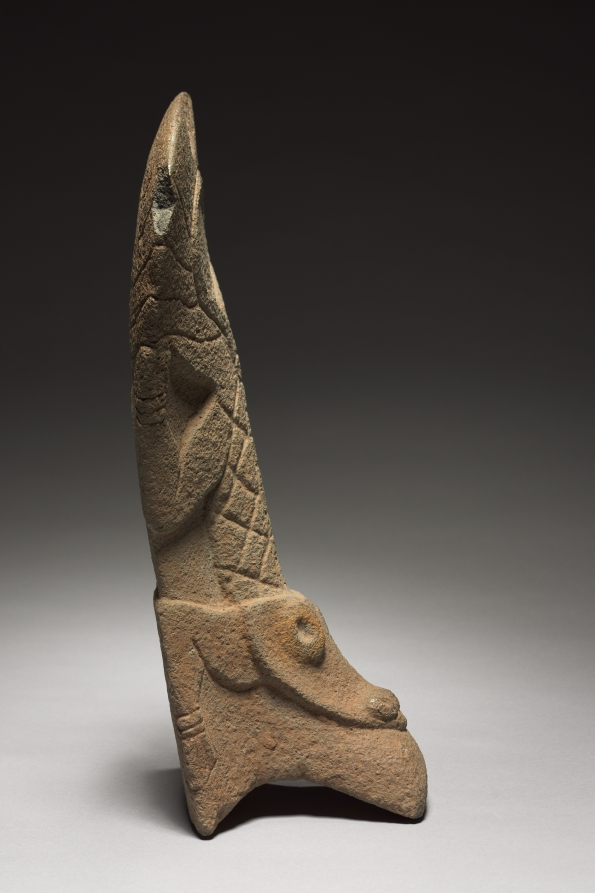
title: Ballgame Palma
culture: Mexico, Gulf Coast, Classic Veracruz style (600-1100)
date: 900–1100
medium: stone, pigment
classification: Sculpture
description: Stone palmas, so-called today for their palm-frond-like shape, are ceremonial sculptures that may replicate lightweight gear worn over the chest during the ballgame. Palma imagery is not well-studied and the meaning of the caiman (New World alligator) carved on both sides of this example is unknown. The tail is beautifully adapted to the palma's curved upper edge.